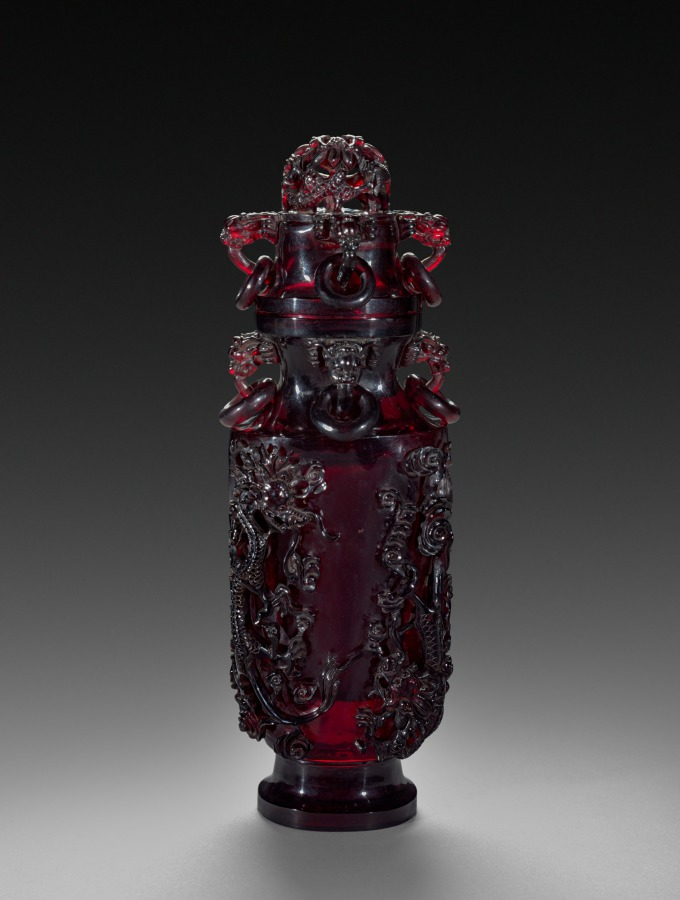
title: Vase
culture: China, Qing dynasty (1644–1911), Qianlong reign (1736–95)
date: 1736–95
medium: carved red amber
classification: Stone